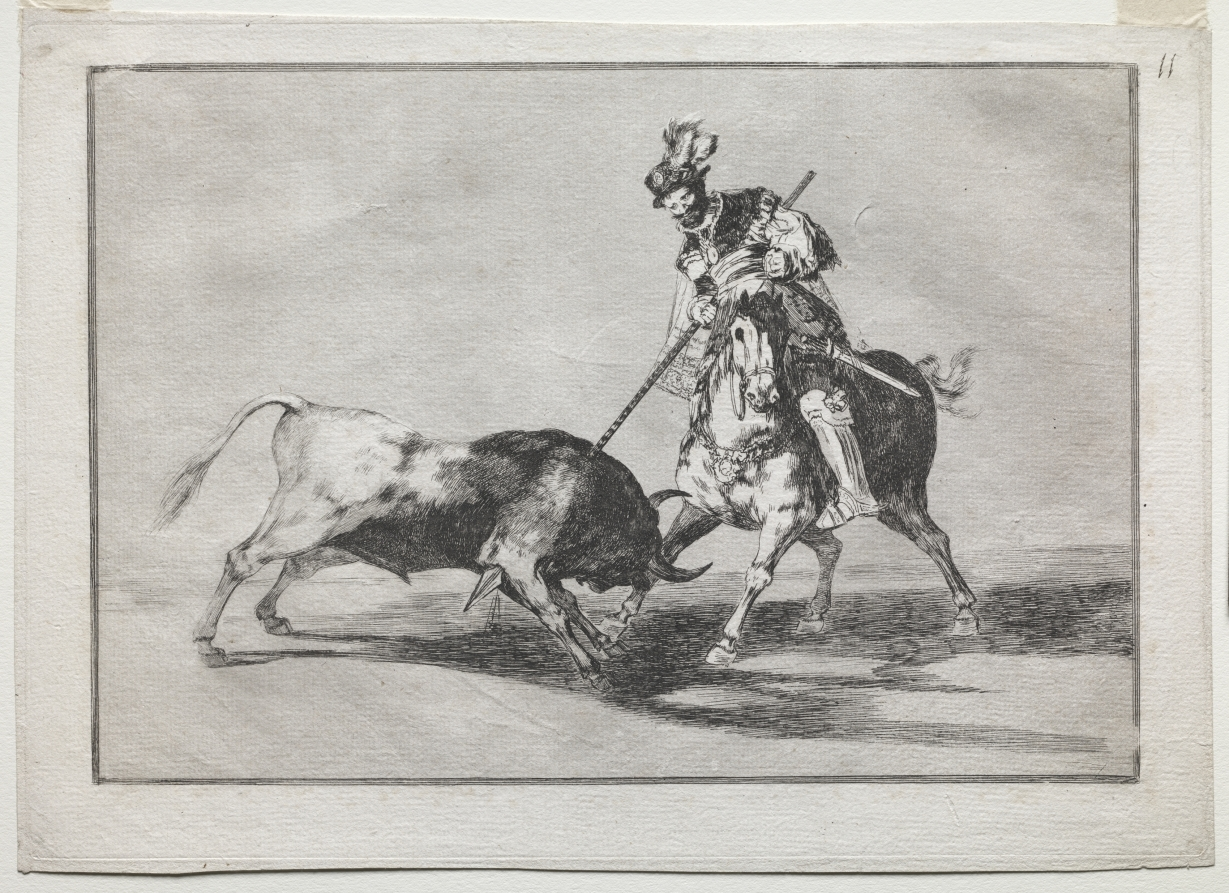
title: The Cid Campeador Spearing Another Bull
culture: Spain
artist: Francisco de Goya (Spanish, 1746–1828)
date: 1815–1816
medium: etching, aquatint and engraving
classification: Print